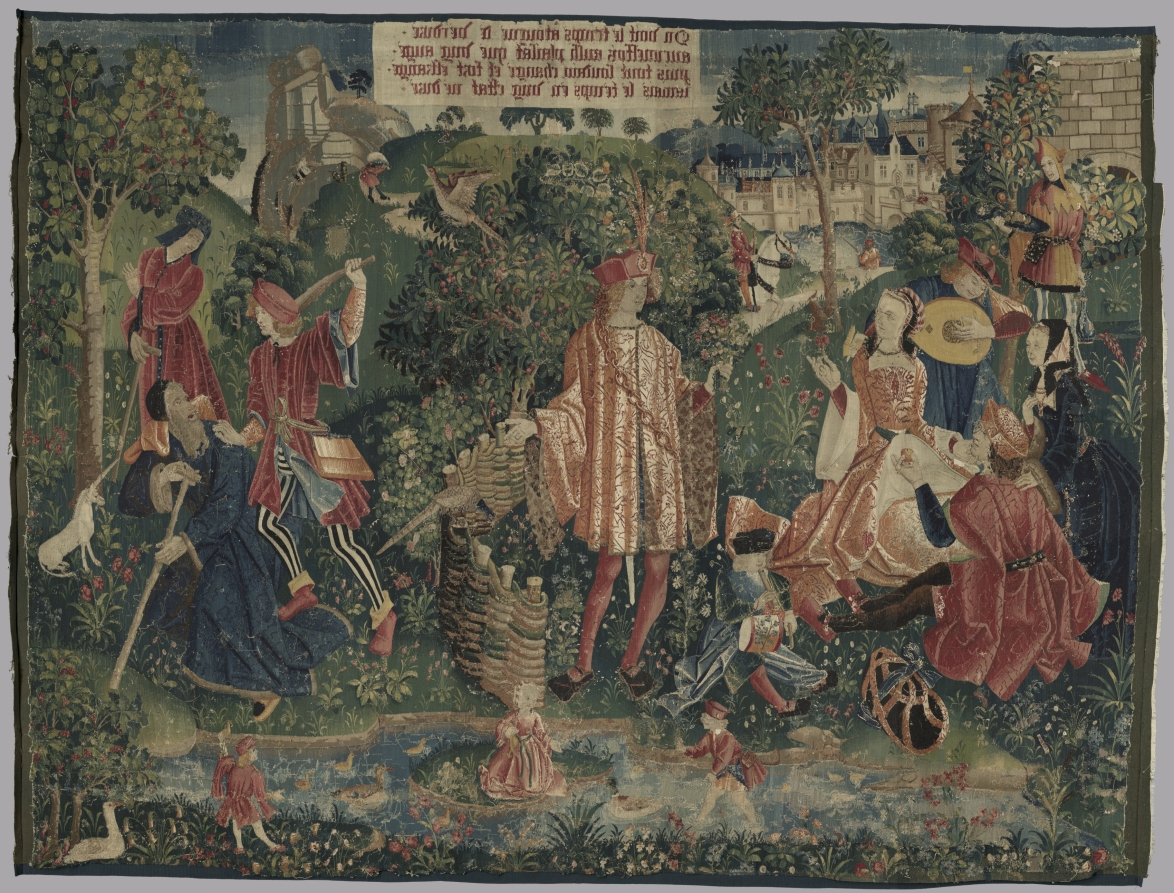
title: Time (from Chateau de Chaumont set)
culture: France, Lyon(?), early 16th century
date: 1512–15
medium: silk and wool; tapestry weave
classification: Tapestry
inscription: French verse in Gothic letters translates as follows: "One sees the weather adorned in green, Sometimes as pleasing as an angel; To suddenly change and be quite strange, The weather never stays the same."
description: Pierre Sala, who likely commissioned the set, is portrayed as the richly attired central figure offering a bouquet, a symbol of knowledge, to Éléonore, his daughter. Éléonore is pregnant, revealed by her upturned skirt and the persimmon in her husband Hector’s hand. Hector’s mother, Marguerite, in dark attire, will wed the widowed Sala in 1519. They appear in front of the royal chateau of Blois. The figures at the right convey Sala’s advice to his children. Time (the old man with the staff) with Clio, the Muse of History, standing on his shoulders, is being attacked by a Herculean youth wielding a stick. With this allegory, Sala is explaining that youth is ignorant of the complexities of life and time. The small unicorn at the far right represents the soul. The verse in Old French at the top refers to changing time: One sees Time adorned with green foliage, Sometimes as pleasant as an angel, Then suddenly change and become quite strange. Never does Time persist in one state.